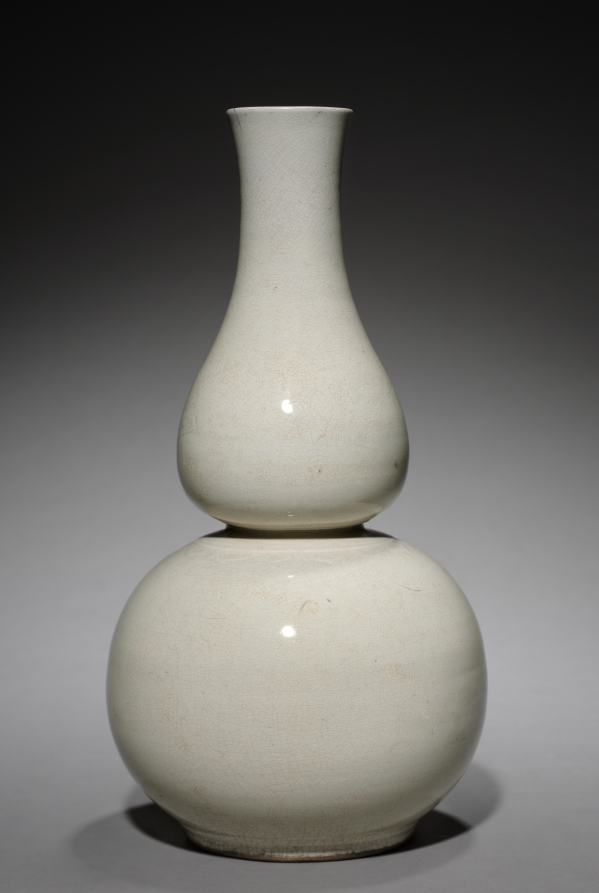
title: Double Gourd-shaped Bottle: Ding ware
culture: China, Ming dynasty (1368–1644)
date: 1368–1644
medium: porcelain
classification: Ceramic